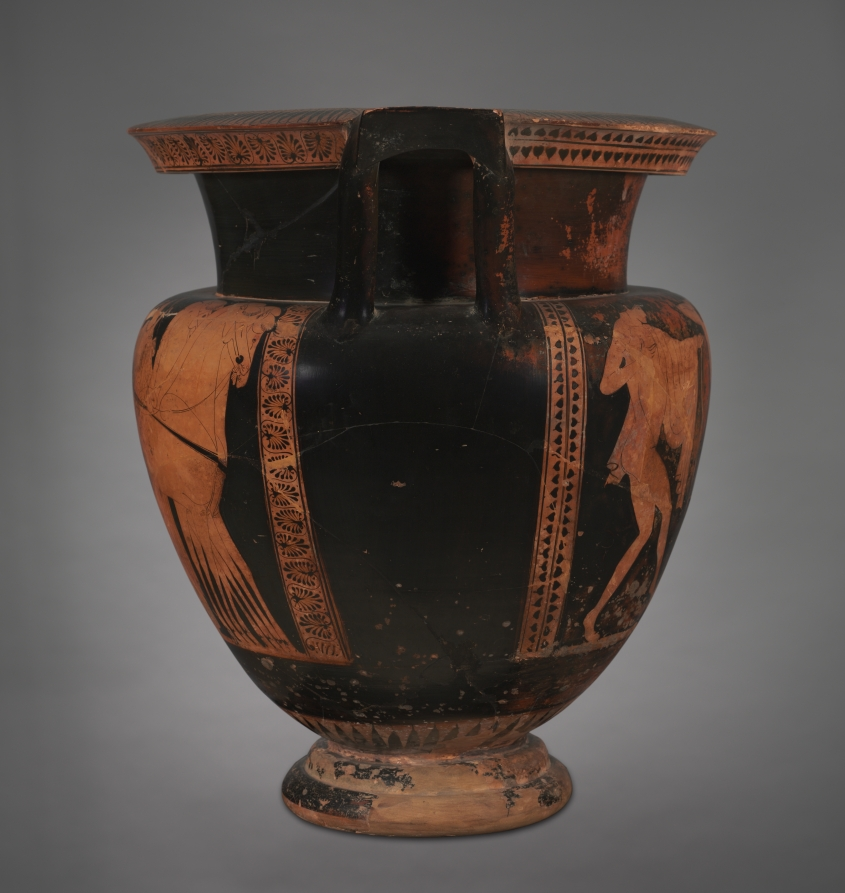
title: Red-Figure Column Krater (Mixing Vessel): Apollo and Goddesses with Chariot (A); Komos (Revel) (B)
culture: Greek, Attic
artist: attributed to Cleveland Painter (name vase; Greek, Attic, active c. 470–460 BCE)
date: c. 470–460 BCE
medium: ceramic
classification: Ceramic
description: Since this column-krater is the most important of 12 vases painted by a Greek artist whose name is unknown, the great English vase expert, Sir John D. Beazley, named him (or her) the Cleveland Painter, after our city. Other vases by the Cleveland Painter are now in New York, Vienna, Paris, and Copenhagen, as well as museums in Greece and Italy. The chariot scene on the main side of the vessel is a divine one, as indicated by the presence of Apollo, identified by his lyre and laurel wreath. With him are three goddesses, probably his sister Artemis (facing him), together with Hera (wearing a crown and holding a scepter and libation dish), and Hebe, the daughter of Zeus and Hera, on her way to meet her future husband, Herakles.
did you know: The revelers on this vessel dance to the music of the barbiton, a stringed instrument associated with leisure and luxury.